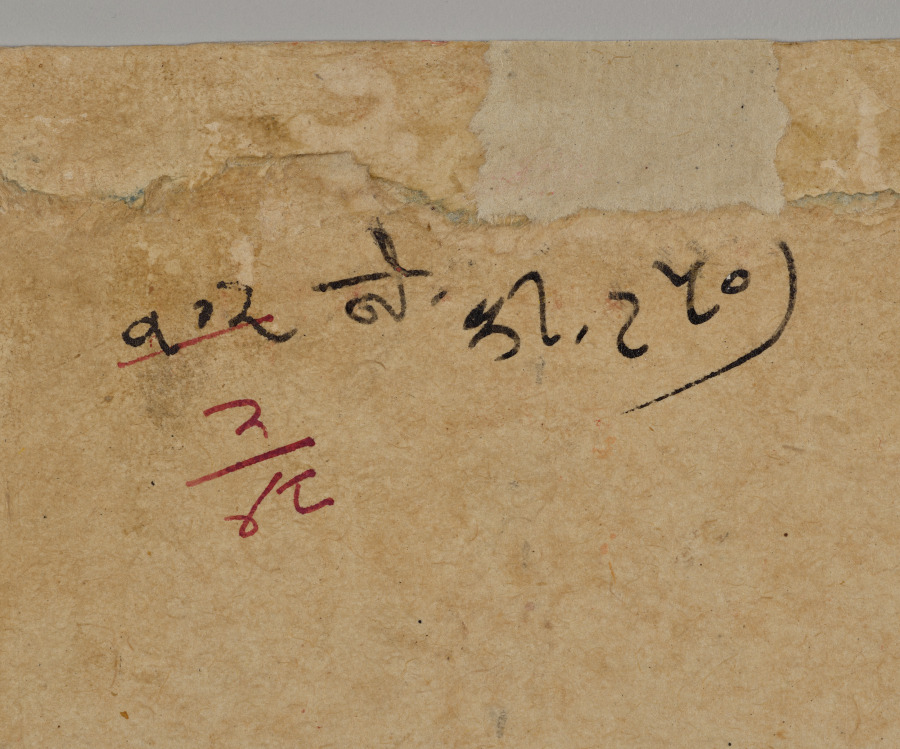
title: Maharana Sangram Singh II of Mewar (r. 1710–34) and Stages a Boar Hunt with Tigers at Sadri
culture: Northwestern India, Rajasthan, Rajput Kingdom of Mewar, Udaipur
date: c. 1720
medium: gum tempera, ink, and gold on paper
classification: Painting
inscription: [[verso, in red]] 2/48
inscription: [[verso, upper right corner]] sāḍāri od kālo cita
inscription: [[verso, in black, along bottom]] 102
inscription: [[verso, in black, to right of old inventory number]] Kimat RS 150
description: The king, who has the title of “maharana” in this region, is identifiable by his halo. At the bottom of the composition, he is pictured three times, welcoming two distinguished visitors who arrived in palanquins. He is shown again, standing behind a safety net at the corner of the white platform. He aims his arrow to shoot the boar and demonstrate his skill and virility. Two tigers are led into the arena at the top edge, and they are depicted multiple times chasing and capturing the prey.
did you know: The enclosure wall is shown from multiple perspectives, sometimes from above, sometimes in elevation.